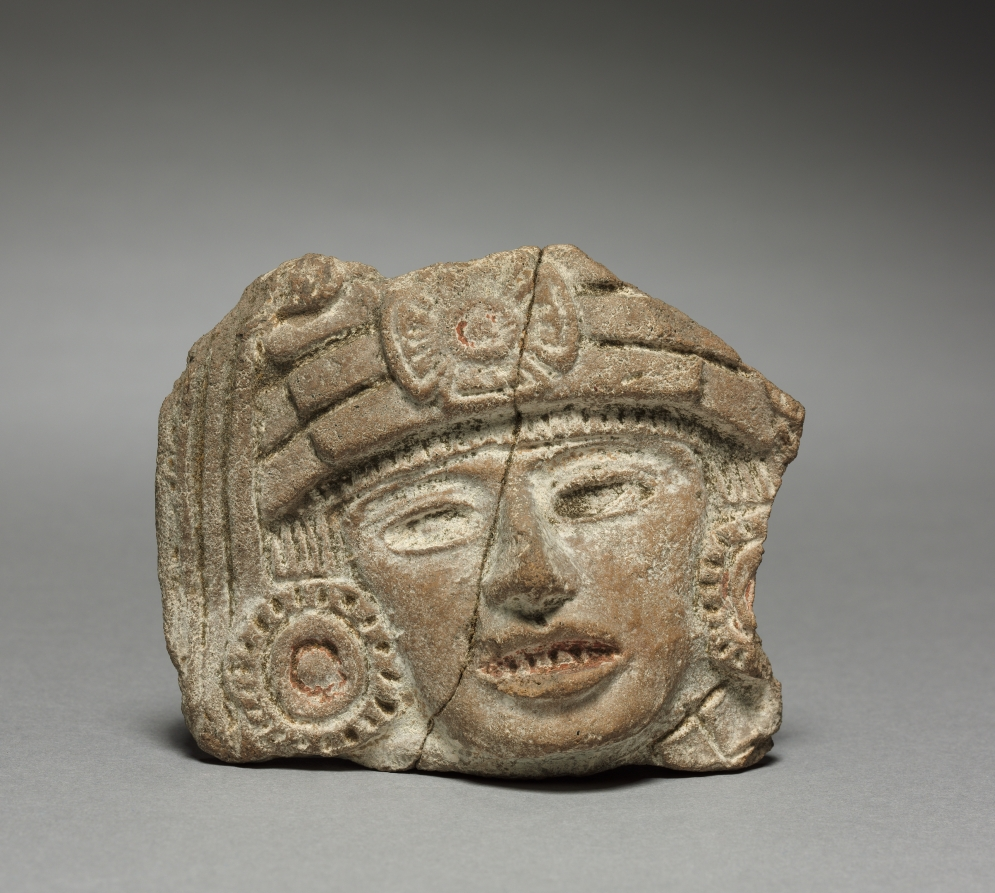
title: Head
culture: Mexico, Teotihuacan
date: 1–750 CE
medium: pottery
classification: Ceramic